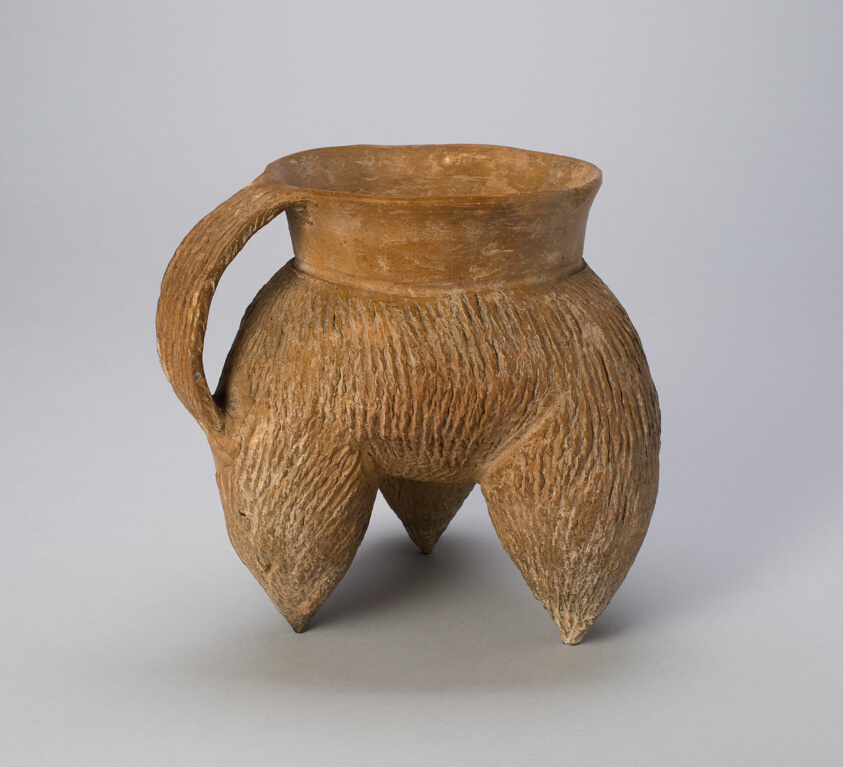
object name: Vessel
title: Lobed Tripod Cauldron (Li)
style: Chinese (culture or style)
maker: China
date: Longshan culture (c. 2500–2000 BC)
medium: Earthenware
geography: China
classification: earthenware; asian art; ceramics; vessel